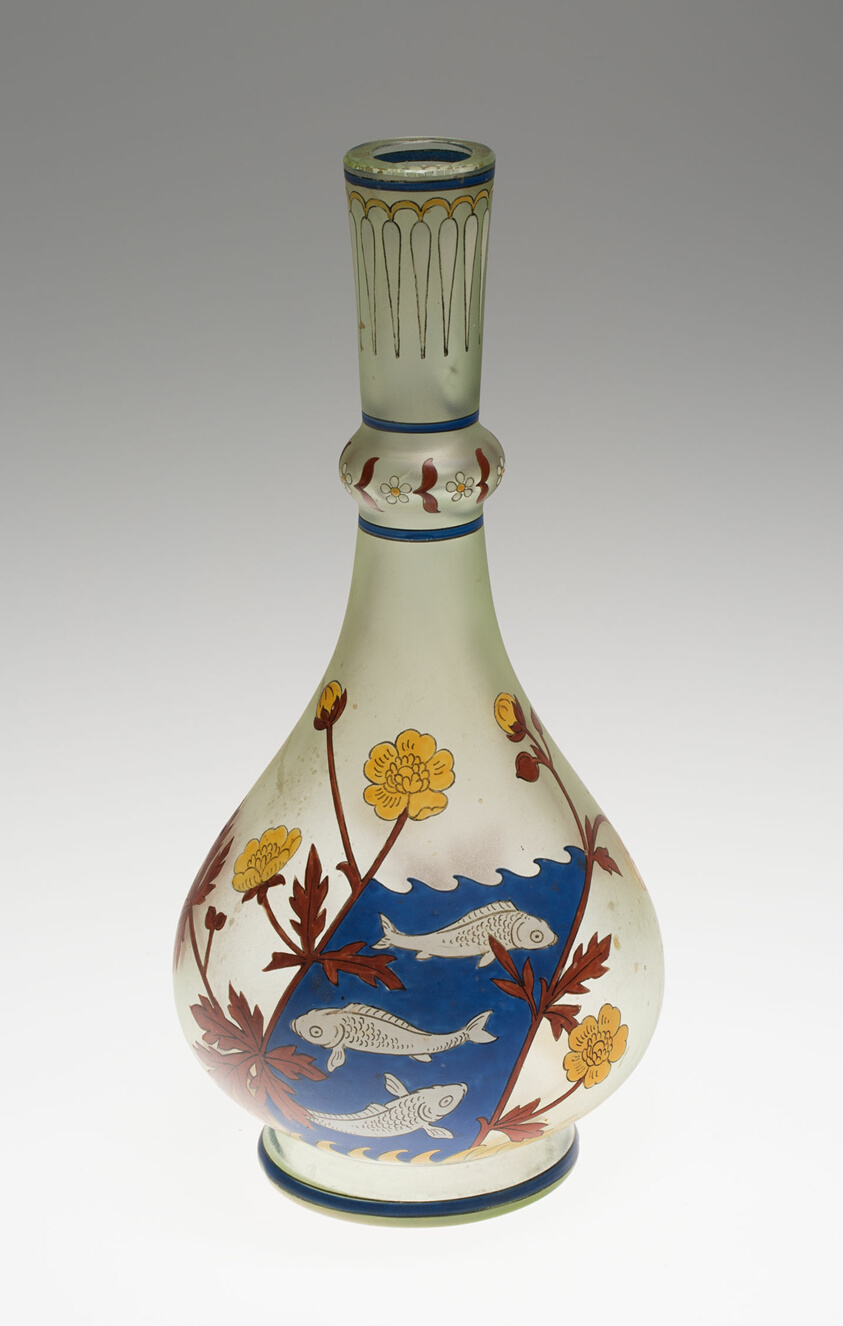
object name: Glass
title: Vase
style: Art Deco, Art Nouveau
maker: Fritz Heckert Glass Refinery and Glassworks; Petersdorf, Silesia (now Poland), 1866-1923; Probably designed by Otto Thamm; German, 1860-c. 1905; Probably decorated by Max Rade; German, 1840-1917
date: c. 1899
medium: Glass with enamel decoration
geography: Silesia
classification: vase; vessel; glass; european decorative arts